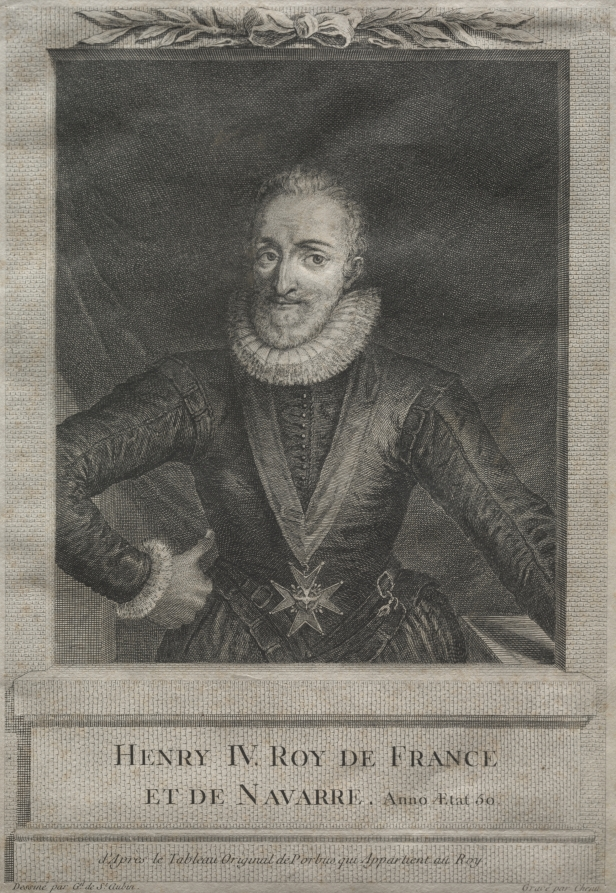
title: Henry IV, King of France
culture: France, 18th century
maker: after Gabriel de Saint-Aubin (French, 1724–1780)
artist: Pierre Chenu (French, 1718?-1795)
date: 1765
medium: engraving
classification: Print